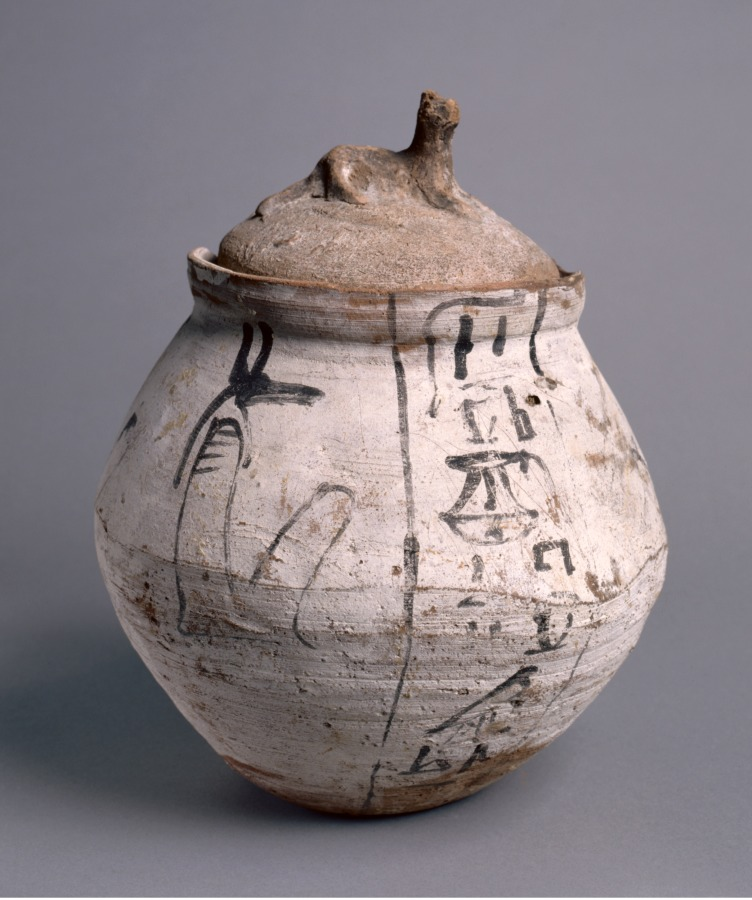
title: Shawabty Jar with Lid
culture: Egypt, New Kingdom (1540–1069 BCE), Dynasties 19–20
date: 1295–1069 BCE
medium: Nile silt ware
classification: Funerary Equipment